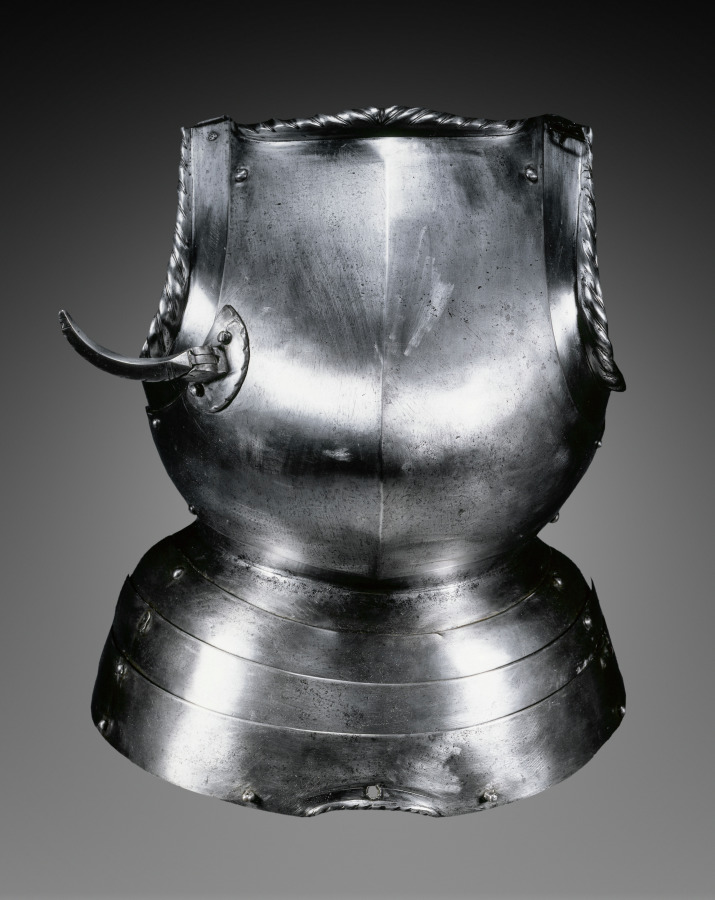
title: Breastplate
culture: Germany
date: c. 1540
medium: steel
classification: Arms and Armor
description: The breastplate protects the chest and abdomen and is normally worn with a backplate. This one features a lance rest which start to appear as early as the late 1300s. The purpose of the lance rest is not to bear the weight of the lance. Instead allows a mounted warrior to hold the lance firmly couched under his right arm and stops it from sliding backward. If the target is hit the lance rest also acts as a shock absorber, preventing the lance from shooting backward and dispersing the impact via the breastplate all over the upper body rather than leaving it concentrated on the hand. When not needed it can be folded up so that is is out of the way.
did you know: The decoration along the edge is known as a roped edge.